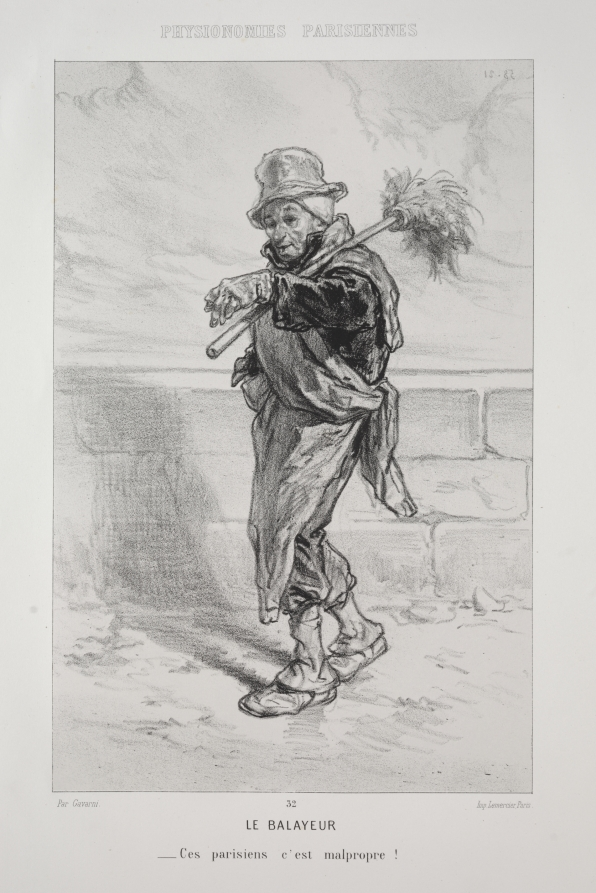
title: Le Balayeur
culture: France, 19th century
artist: Paul Gavarni (French, 1804–1866)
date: c. 1857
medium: lithograph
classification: Print